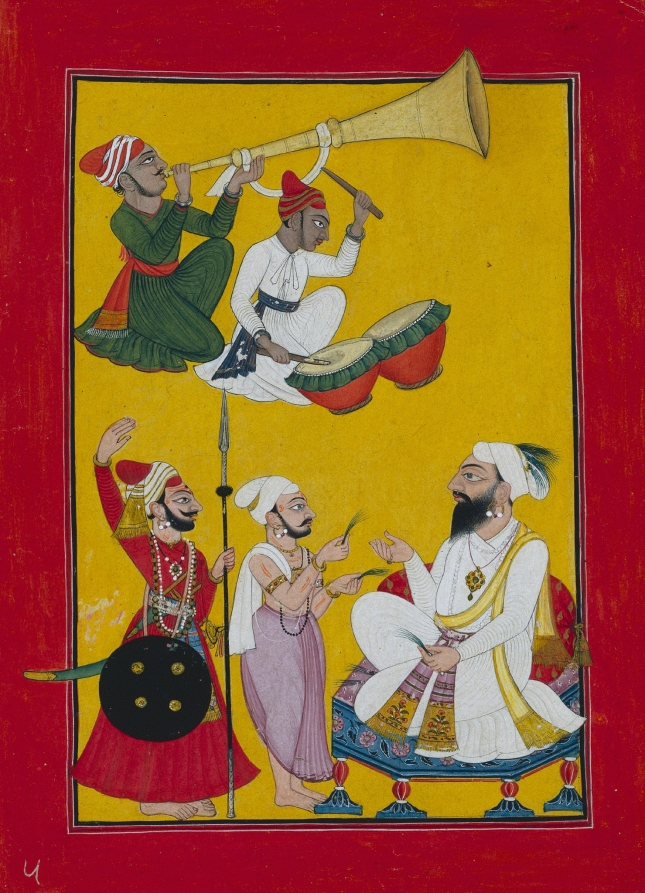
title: Celebrations of Krishna's Birth, from a Bhagavata Purana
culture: Northern India, Pahari kingdoms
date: c. 1725–30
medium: Gum tempera and gold on paper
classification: Painting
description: The Hindu kingdom of Mankot in the western foothills of the Himalayas developed a bold style of painting in which figures in strict profile stand out against an intense yellow ground. Musicians enthusiastically proclaim the arrival of infant Krishna at the village of Vraj, where he was brought as a newborn to grow to maturity in safety among the cowherders. He was secreted away from the evil king Kamsa who wanted to murder the child on account of a prophecy that foretold his own death by Krishna. Krishna’s adoptive father Nanda, the village headmaster, receives tufts of grass as tokens of congratulations from a well-wisher, while a soldier salutes him.